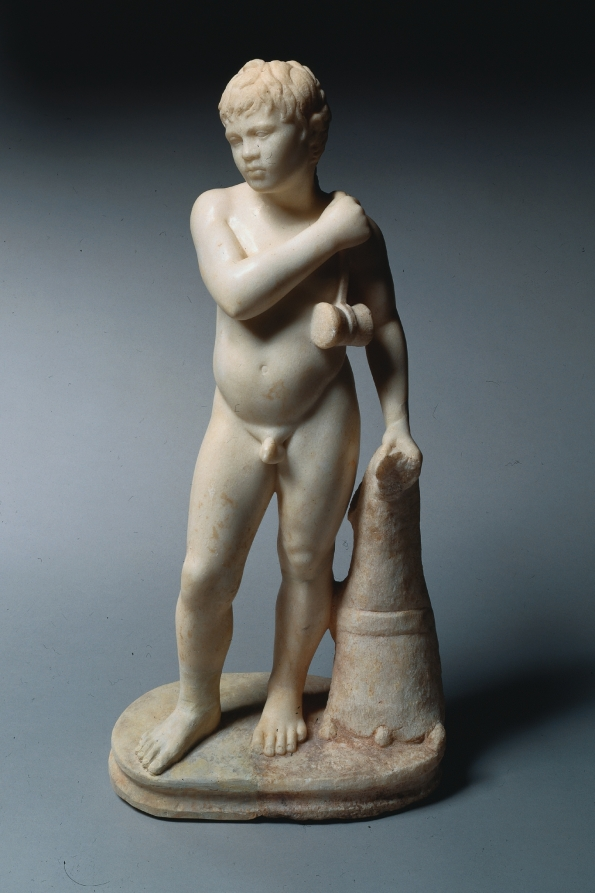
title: Youth with Jumping Weights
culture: Italy, Rome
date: c. 40–70 CE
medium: marble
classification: Sculpture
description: The hourglass-shaped jumping weights slung over his shoulder, together with the animal-skin punching bag on which he leans, characterize this youth as an athlete. The distinctive haircut, short with one long tress in back, may indicate a childhood vow, perhaps to be trimmed in a future ceremony. Several very similar sculptures exist in other collections, suggesting the existence of a single prototype, now lost.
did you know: The lower right leg and foot of this sculpture do not survive, and have been reconstructed.